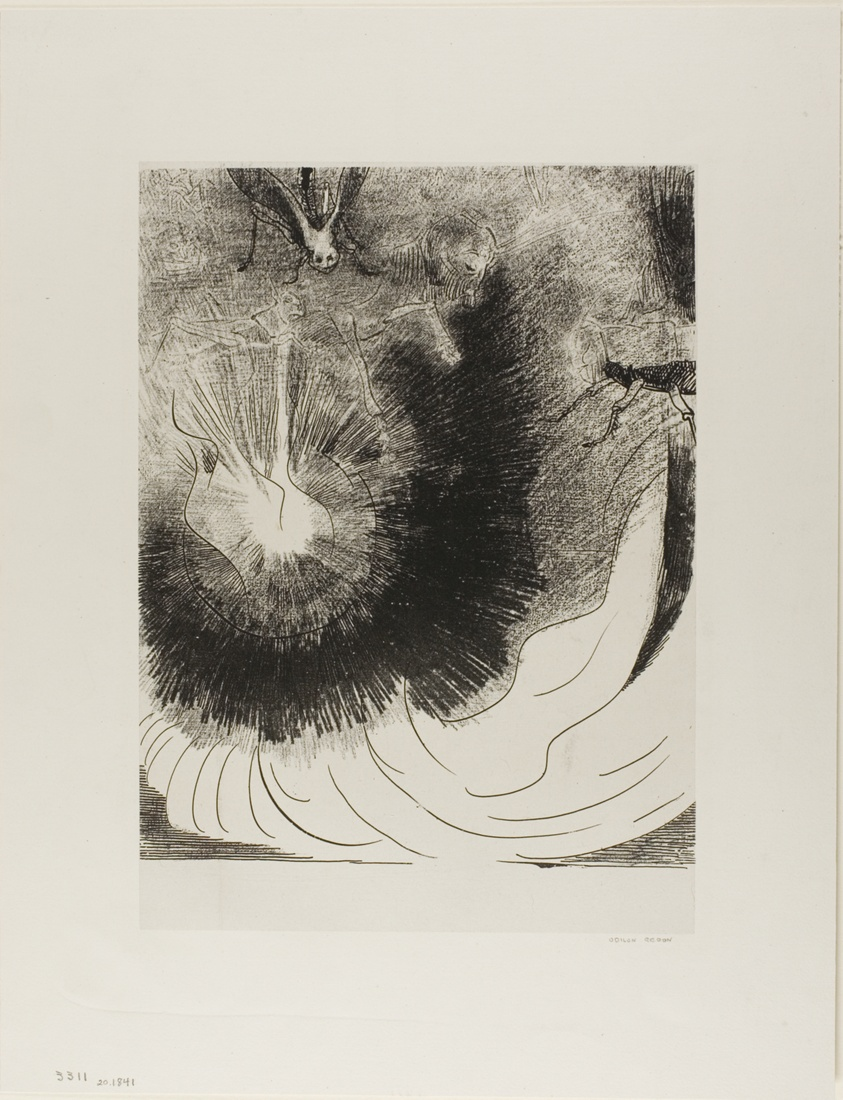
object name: Print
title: And There Fell a Great Star From Heaven, Burning as it Were a Lamp, plate 5 of 12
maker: Odilon Redon (French, 1840-1916)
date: 1899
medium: Lithograph in black on ivory China paper laid down on ivory wove paper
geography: France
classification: lithograph; print; prints and drawing; paper